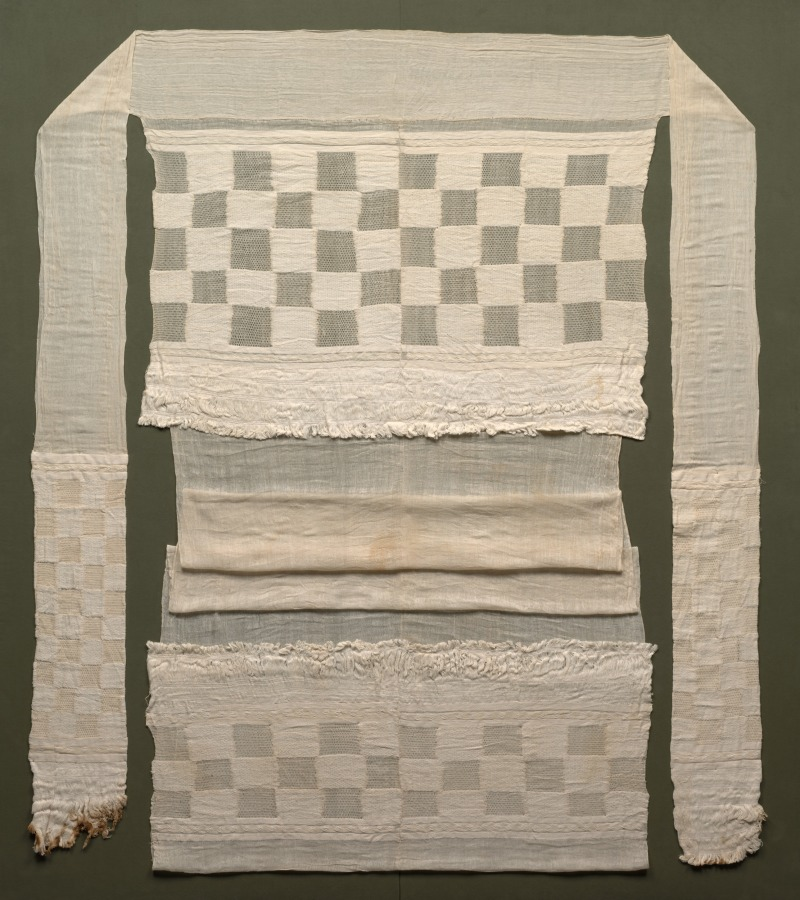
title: Loincloth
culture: Peru, North Coast, Chimú style, 1200–1460s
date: 1425–1500 (radiocarbon date, 92.3% probability)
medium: cotton; plain weave, brocaded and complex alternating gauze with 5 shots of plain weave between gauze shots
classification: Garment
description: Loincloths were basic men’s wear in ancient Peru. But the extraordinary size of some examples—this one is about eight feet long, unfolded—makes it difficult to know how they were worn, except that they were tied around the waist with the decorated panels hanging at the front and back of the body. The appearance may have been that of a billowing skirt.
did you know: This loincloth is huge!